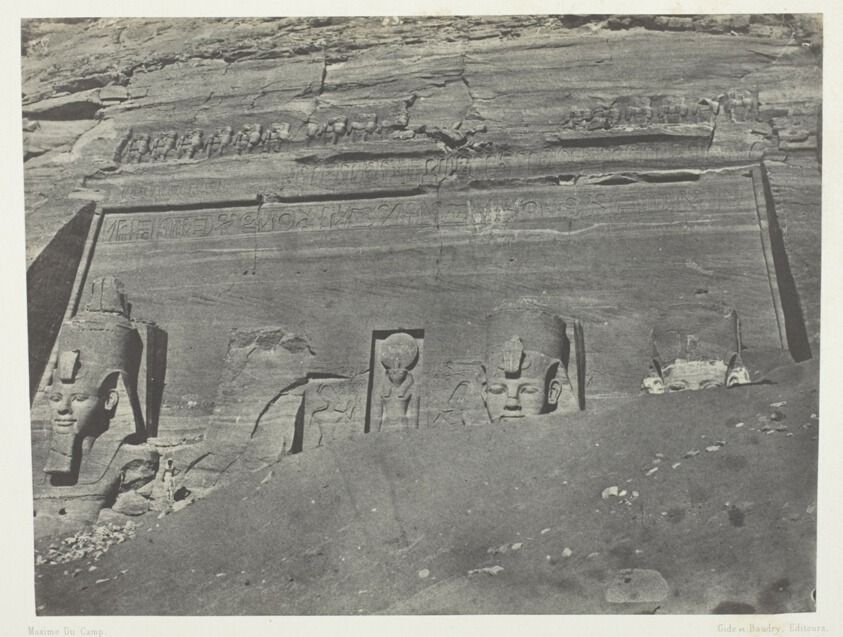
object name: Photograph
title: Ibsamboul, Vue Générale Du Grand Spéos De Phrè; Nubie, plate 102 from the album "Egypte, Nubie, Palestine et Syrie" (1852)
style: 19th century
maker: Maxime Du Camp (French, 1822–1894)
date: 1849/51, printed 1852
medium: Salted paper print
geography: France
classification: salted paper print; photographic process; photography; photograph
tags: Collected by Hugh Edwards, Egypte, Nubie, Palestine et Syrie